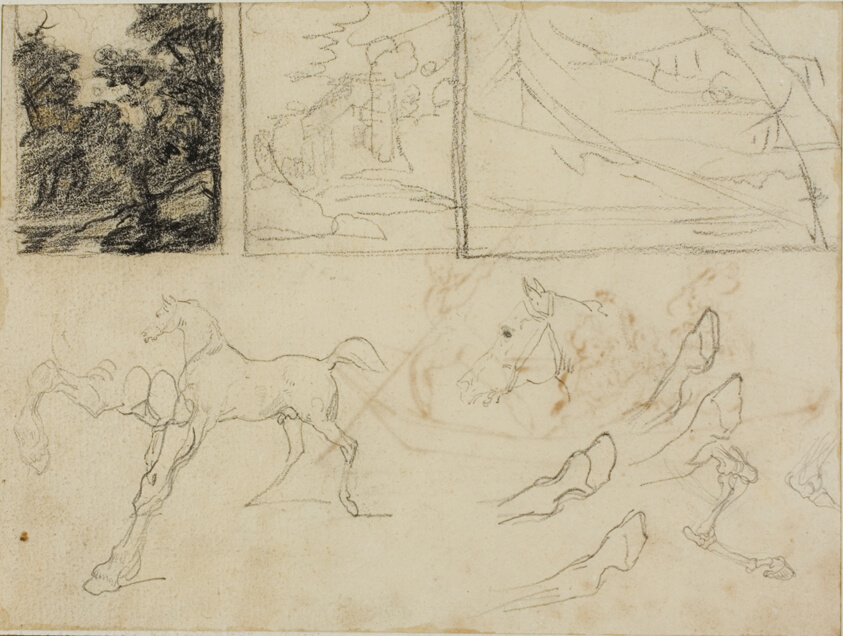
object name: Drawing and Watercolor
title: Sheet of Sketches: three Landscapes, Horses, and Hooves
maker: Jean Louis André Théodore Géricault (French, 1791-1824)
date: 1813/14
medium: Graphite and black pastel, on cream wove paper, perimeter mounted on ivory laid paper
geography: France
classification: chalk; drawings (visual works); prints and drawing